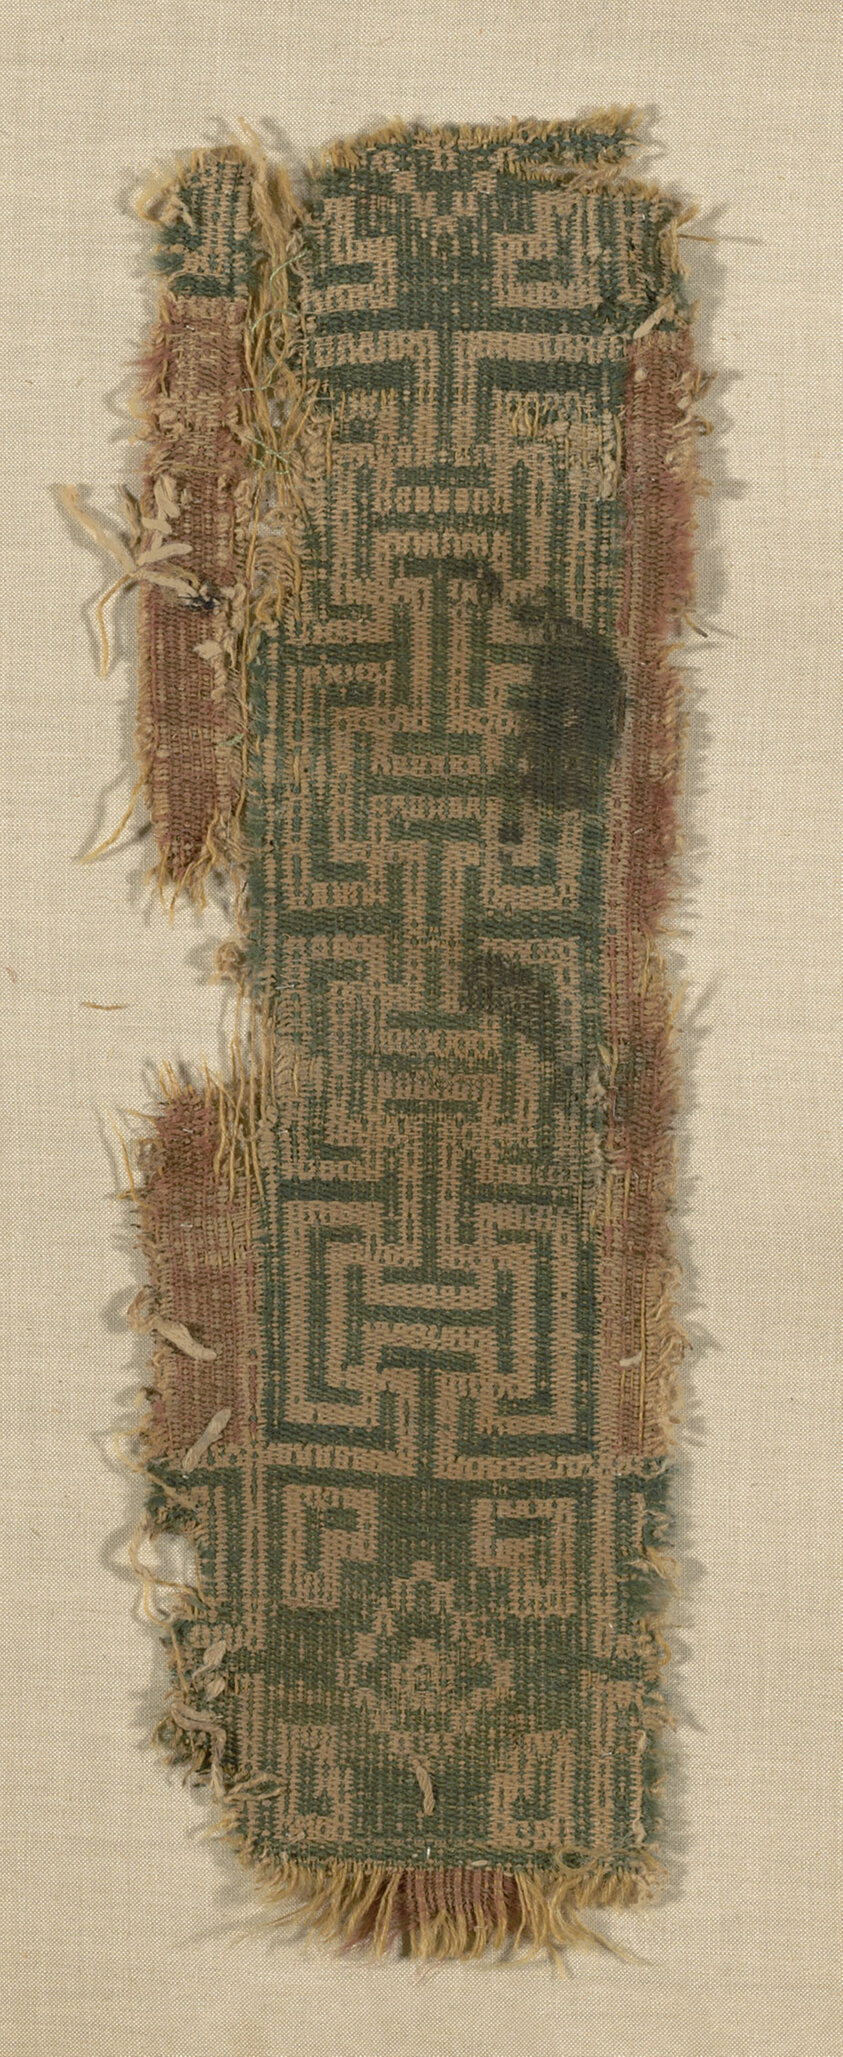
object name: Textile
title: Fragment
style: roman period (egyptian)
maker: Egypt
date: Roman period (30 B.C.– 641 A.D.), 4th century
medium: Plain compound cloth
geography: Egypt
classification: textile; weaving